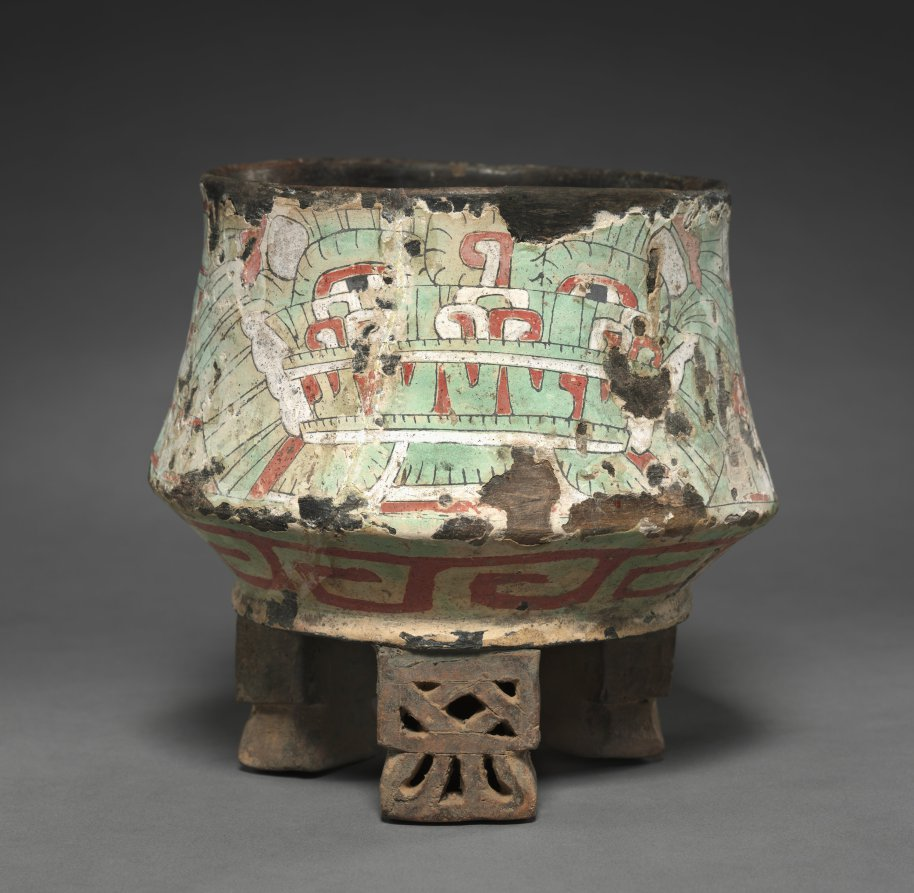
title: Vessel with Butterfly Headdress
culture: Central Mexico, Teotihuacán, Classic period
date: 1–550 CE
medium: ceramic, stucco, pigment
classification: Ceramic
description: The headdress shown on this vessel combines a serpent's mouth with a butterfly's proboscis (feeding tube), which curls between the eyes. The butterfly often appears in the headdress of the Great Goddess, an extremely important Teotihuacán deity. Stucco (paper-thin, painted plaster) is fragile and usually does not survive well; the stucco of the basin in this case has been repaired.